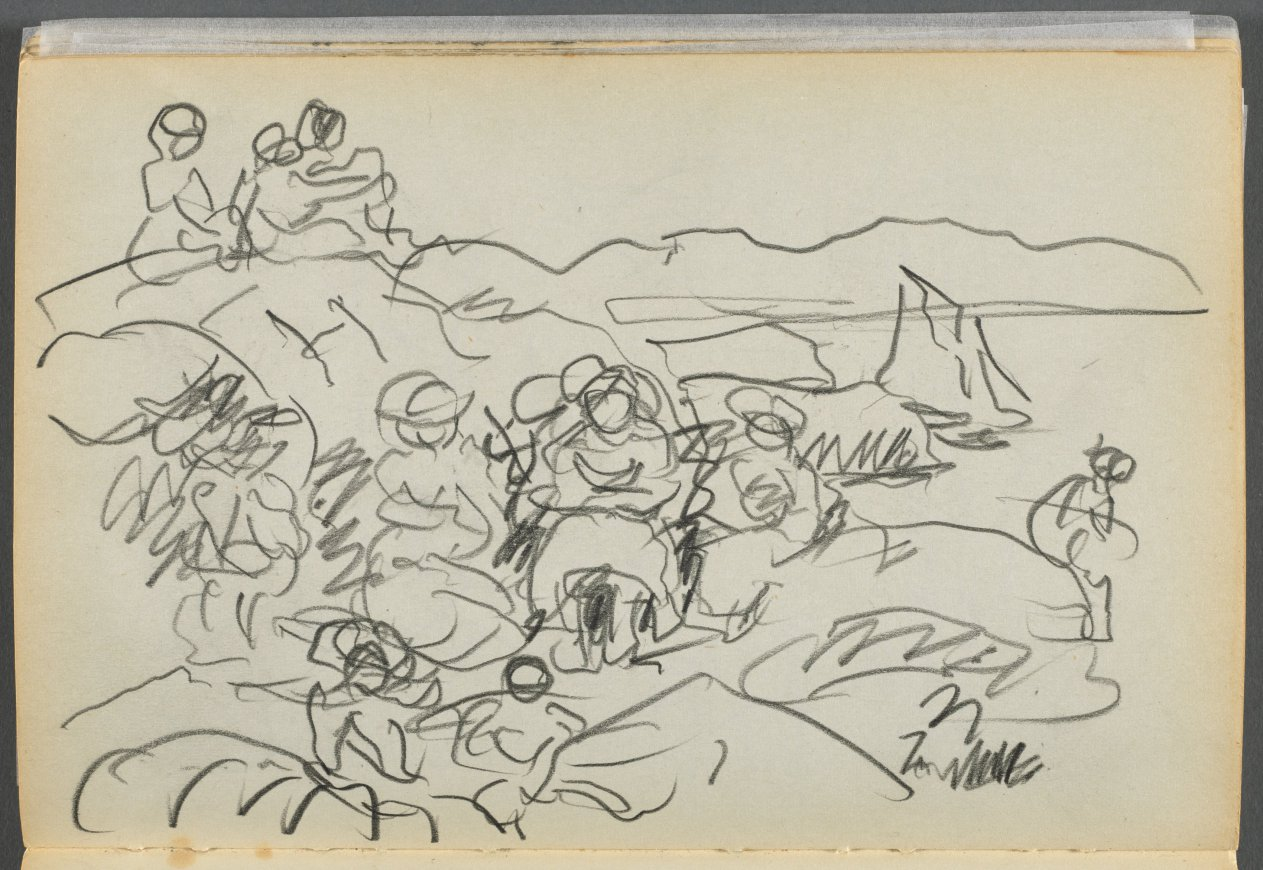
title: Sketchbook- The Granite Shore Hotel, Rockport, page 096: Picnickners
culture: America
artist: Maurice Prendergast (American, born Newfoundland [now Canada], 1858–1924)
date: 1905–10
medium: graphite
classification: Bound Volume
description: This sketchbook contains 72 pages of pencil drawings and 9 watercolors of Cape Ann. On the inside of the cover Prendergast wrote the address of the Granite Shore Hotel in Rockport, Massachusetts.